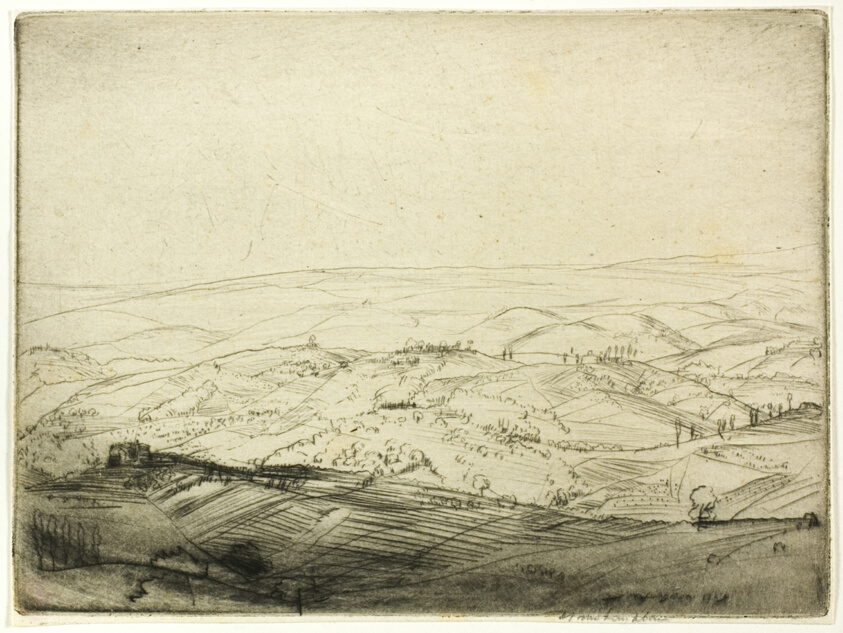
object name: Print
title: Sketch from the Walls of San Gimignano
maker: Donald Shaw MacLaughlan (American, born Canada, 1876-1938)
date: 1909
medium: Drypoint in black on cream laid paper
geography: United States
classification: etching; print; prints and drawing